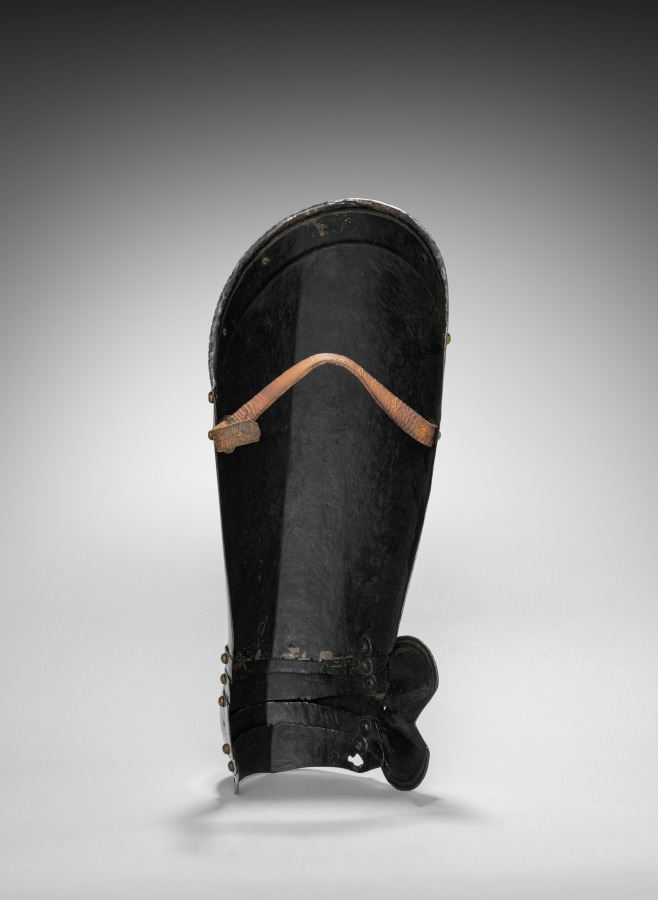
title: Proper Right Cuisse and Knee Cop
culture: South Germany, 16th century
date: c. 1560–1580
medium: steel, leather straps, brass rivets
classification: Arms and Armor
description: This armor was developed for the joust-a sporting combat between two mounted contestants. Although all of the elements of this armor date from the same period, they are not all from the same suit. This armor is thus called "composed." It also shows the asymmetry of jousting armor. The participants rode along a wall-like barrier known as a "tilt" with their left sides facing one another. Consequently, armor on that side of the body had to be thicker. Note the large plate (grandguard) over the left shoulder for extra protection. Also, the breathing holes in the helmet were placed on the right side (farthest from an opponent's lance) to avoid injuries from splinters. The bracket attached to the right breastplate is called the lance-rest, a shock-absorbing support designed to accommodate the lance when "couched" under the right armpit.